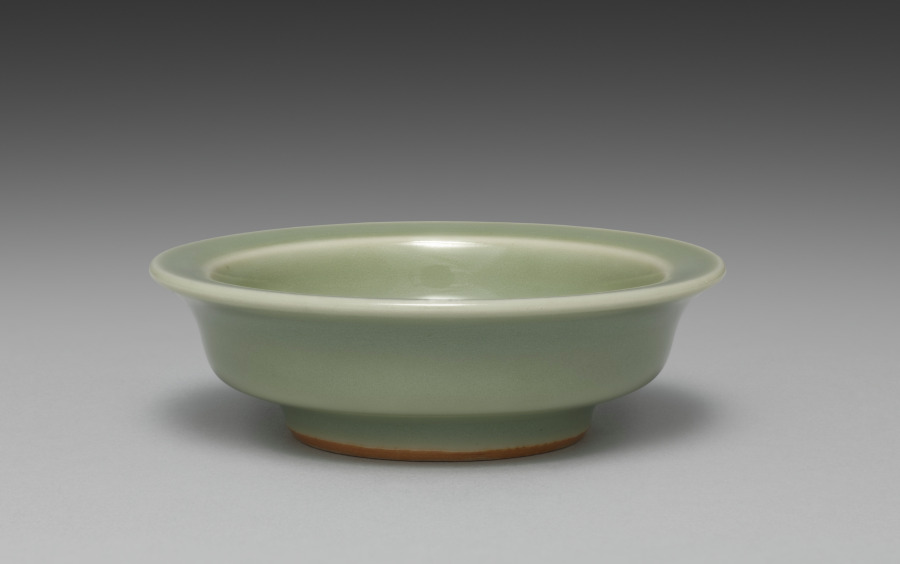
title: Saucer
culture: Japan, Meiji period (1868–1912)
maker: Seifū Yohei III (Japanese, 1851–1914)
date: 1893–1914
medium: One from a set of ten dishes; porcelain with green glaze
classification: Ceramic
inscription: 清風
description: Yohei III’s main output for his sophisticated clientele was in the form of tea sets and dining sets. He created a range of dishes in green glazes. He often produced in pairs, sets of five, or sets of ten. For this set of ten small dishes in a simple, round form that emphasizes the glaze above all, the box lid designates the piece as seiji, or green-glazed porcelain, using a general term for the extensive palette of green glazes often called celadon in English. The box lid further identifies the dishes themselves as tōchō, literally “bean-sized saucers,” a size that makes them suitable for dipping sauces.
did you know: The ten dishes in this set are stored in stacks of five in a two-compartment box.